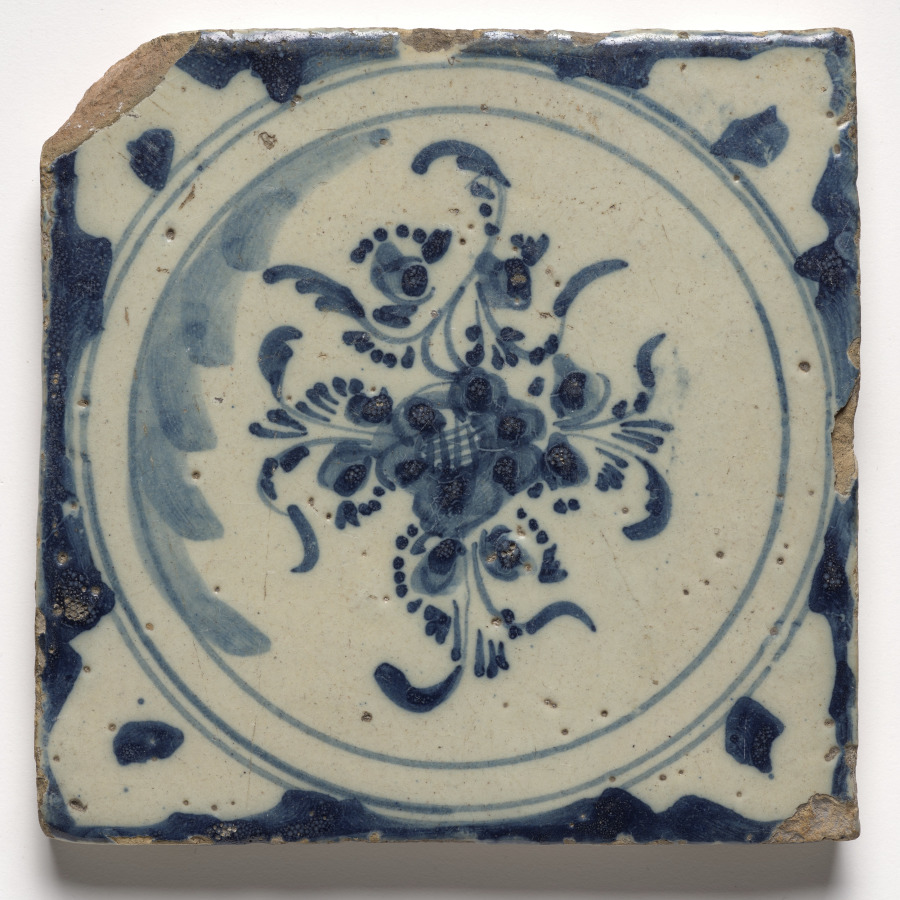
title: Wall Tile–Floral Spray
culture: Spain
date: c. 1600s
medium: glazed ceramic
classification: Ceramic